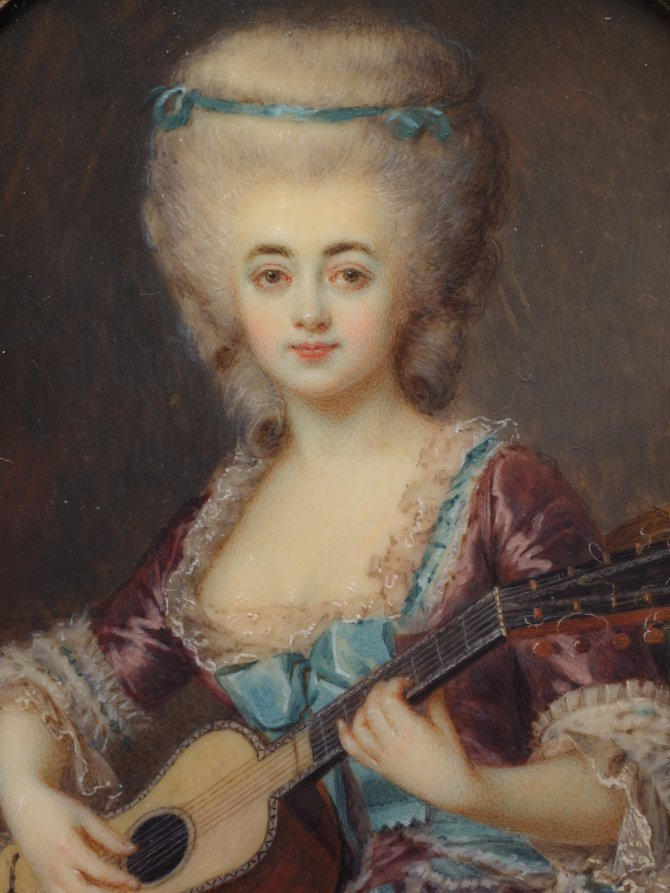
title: Portrait of a Woman with a Guitar, called Louise D'Aumont, Mazarin, Duchesse d'Aumont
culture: France, 18th century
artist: Antoine Vestier (French, 1740–1824)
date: late 18th century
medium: watercolor on ivory in gold mount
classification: Portrait Miniature